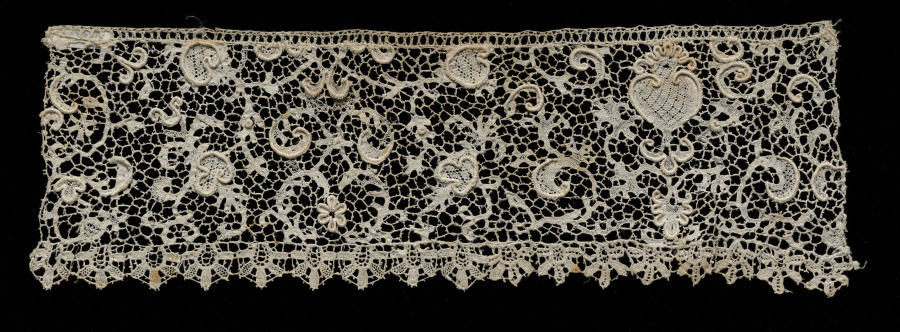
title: Fragment of Lace Edging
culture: France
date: c. 1700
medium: Needle lace (Point de France) edging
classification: Lace